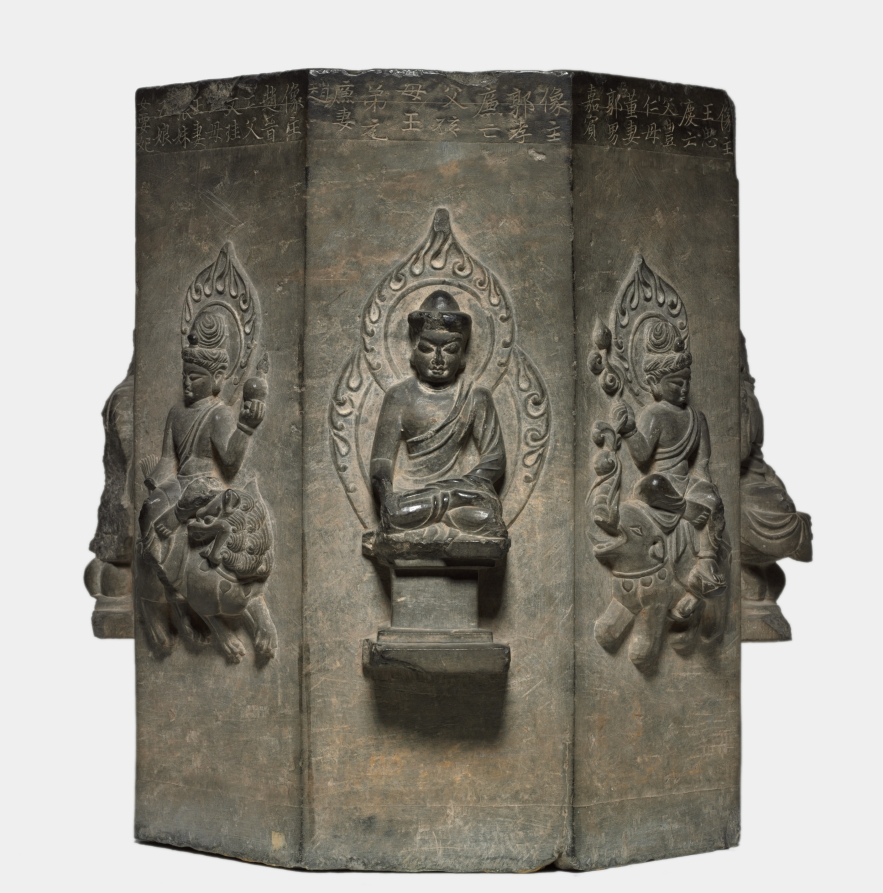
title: Section of a Dharani Pillar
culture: China, Tang dynasty (618-907)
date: 618–907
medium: limestone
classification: Sculpture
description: This octagonal stone pillar, with Buddhist figures carved on its eight sides, is part of a dharani pillar commissioned by Buddhist believers to pay tribute to the dead. The eight inscriptions seen here are eulogies dedicated by eight families to their deceased family members. Dharanis were a form of spell in Esoteric Buddhism said to possess supernatural power when being recited or carried and were incorporated into sutras, such as the Buddha Usnisa Vijaya Dharani Sutra. Dharani pillars, also called sutra pillars, became the dominant bearers of Usnisa Vijaya Dharani which supposedly helped sentient beings prolong life and destroy hardships of the eternal cycle of life and the realms of hell.